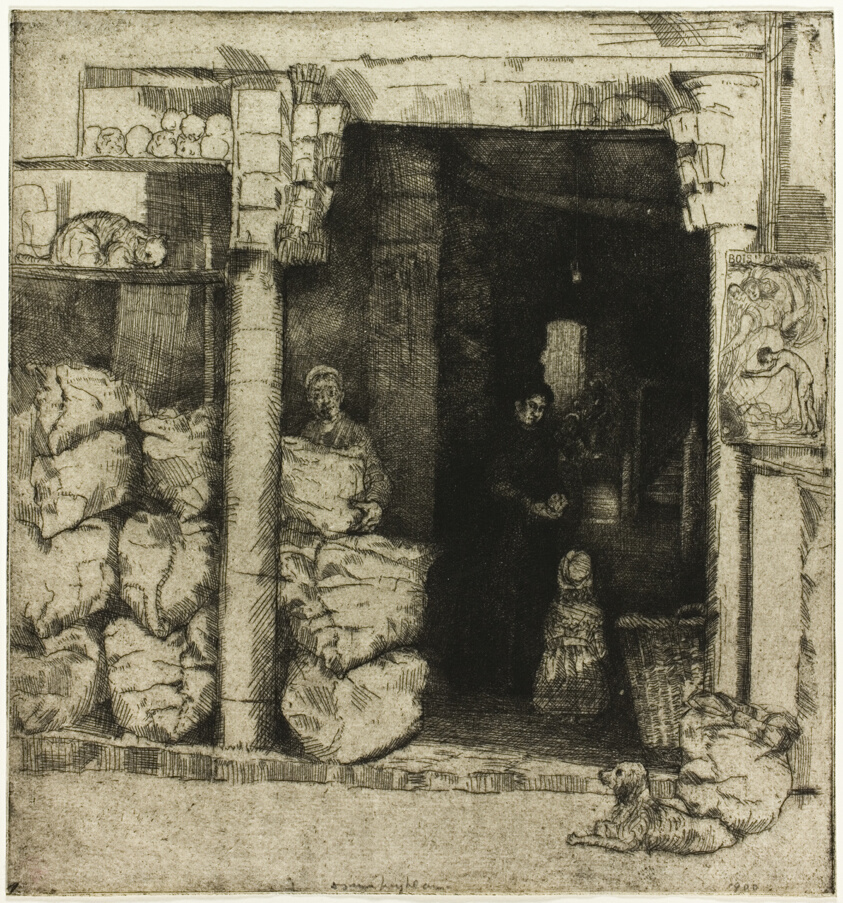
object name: Print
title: Interior of a Coal Shop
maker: Donald Shaw MacLaughlan (American, born Canada, 1876-1938)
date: 1900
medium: Etching in black on cream laid paper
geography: United States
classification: etching; print; prints and drawing